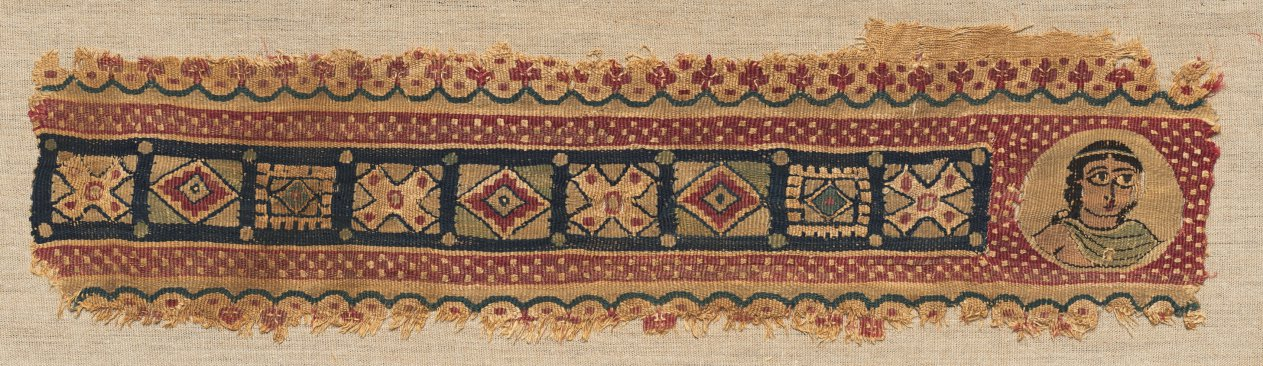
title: Fragment, an Ornamental Band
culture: Egypt, Byzantine period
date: 500s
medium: tapestry (originally inwoven in tabby ground); linen and wool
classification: Textile